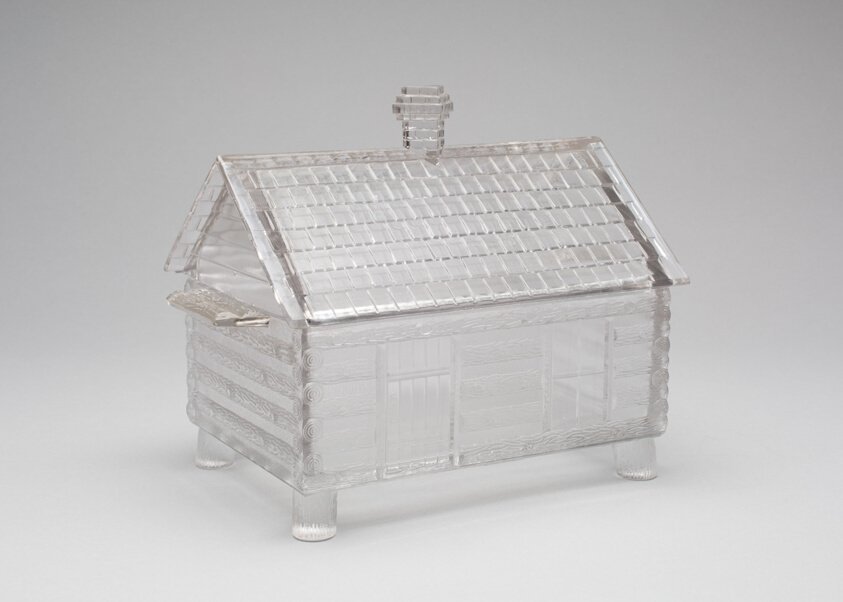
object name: Glass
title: "Log Cabin" pattern covered dish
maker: Central Glass Company; American, 1867–1896; Wheeling, West Virginia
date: c. 1875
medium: Pressed glass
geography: Wheeling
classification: dish (vessel); glass; american decorative arts; american arts; decorative arts